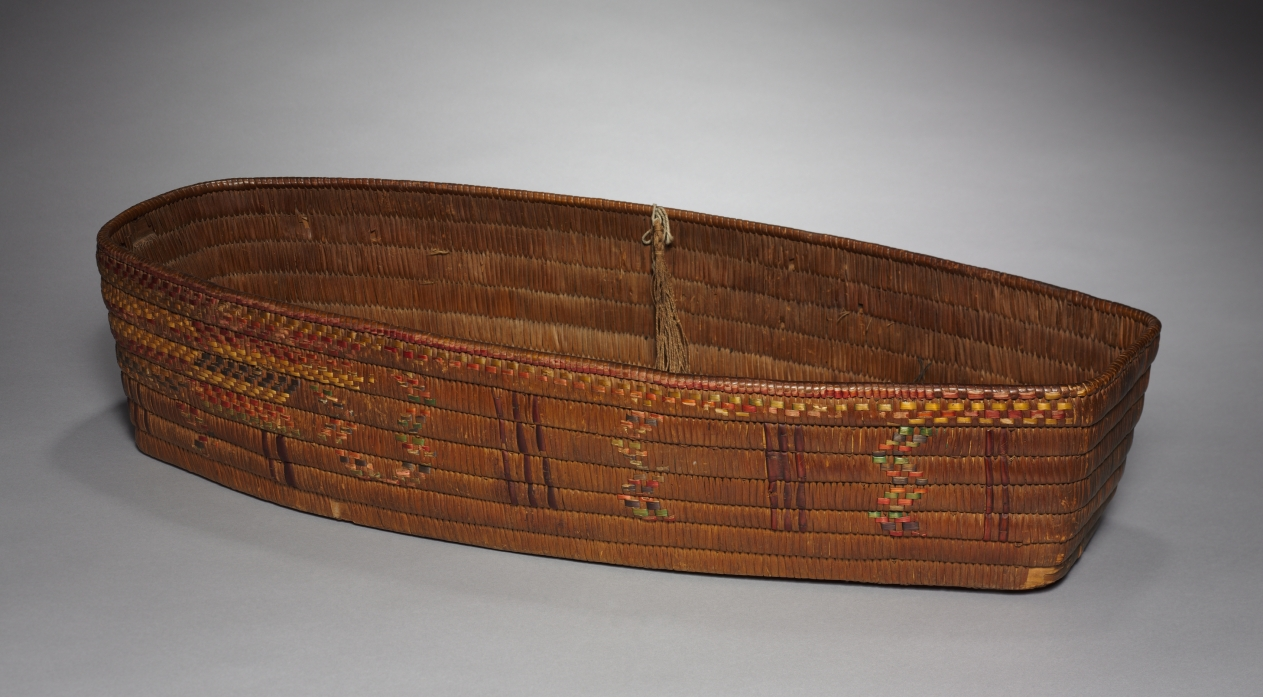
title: Baby Basket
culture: Northwest Coast, Frazer River, Salish, Late 19th century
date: c 1875– 1910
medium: basketry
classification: Basketry